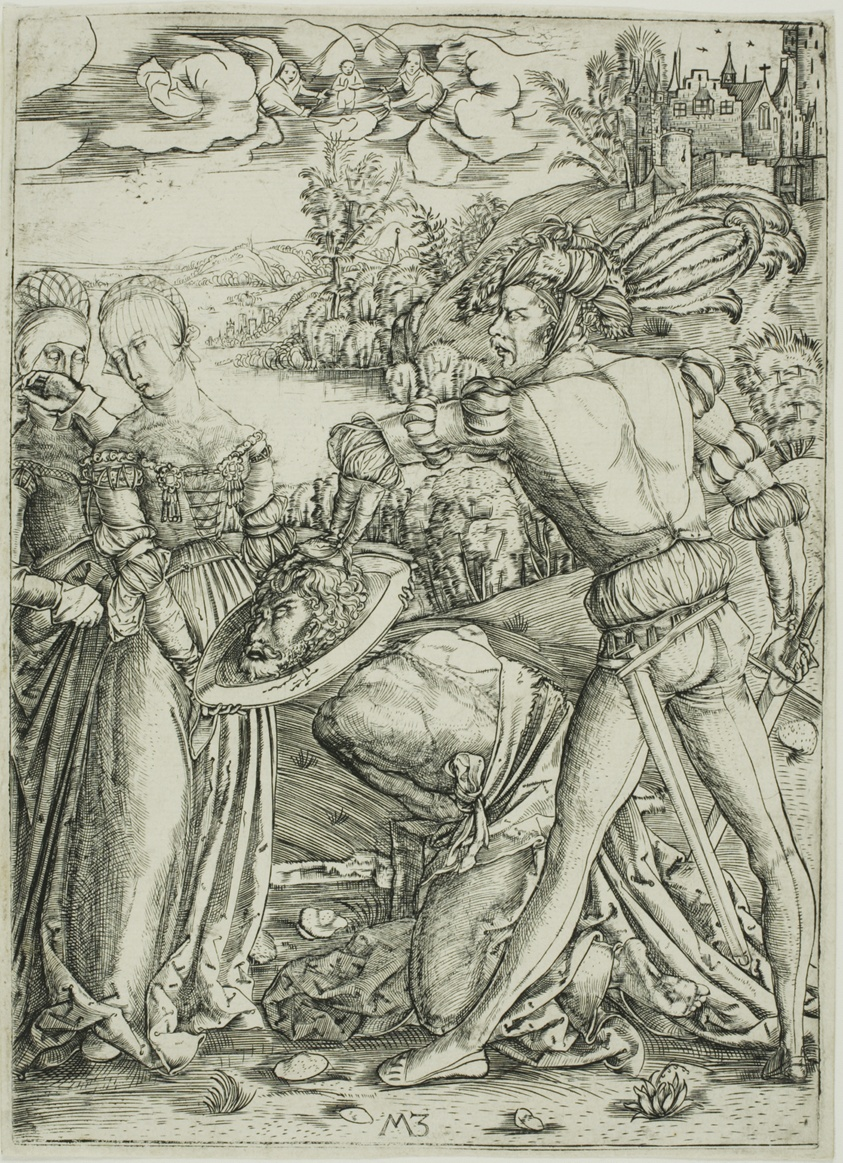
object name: Print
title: The Beheading of St. John the Baptist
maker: Master M.Z.; German, active 1500-1550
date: c. 1500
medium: Engraving on off-white laid paper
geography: Germany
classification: engraving; print; prints and drawing